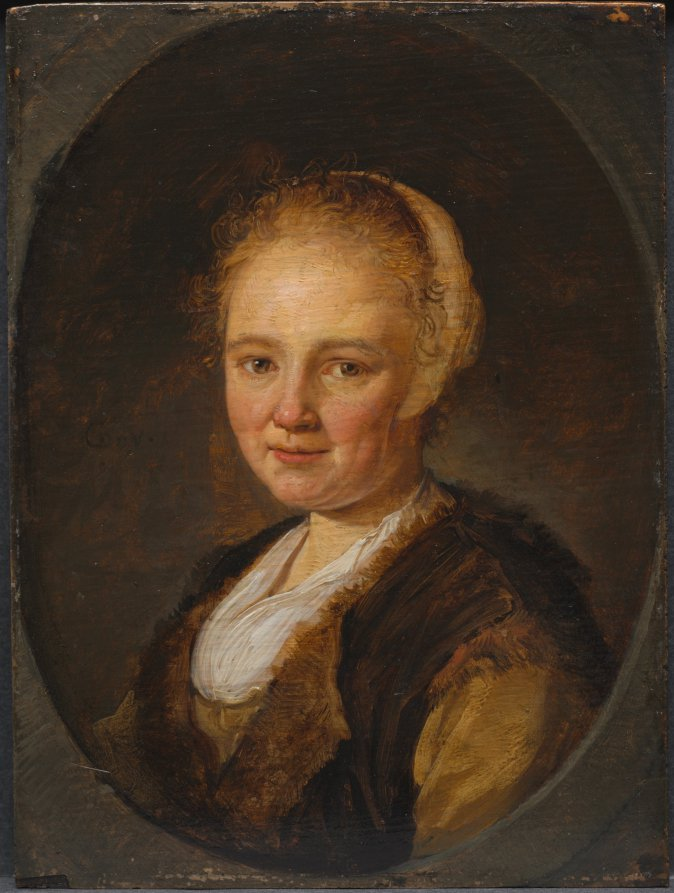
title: A Young Woman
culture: Netherlands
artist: Gerrit Dou (Dutch, 1613–1675)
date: 1640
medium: oil on wood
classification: Painting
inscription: Signed left center: "GDov."; "[GD in monogram]"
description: This painting may depict a specific person as in a traditional portrait. The less formal costume and the tight focus on the head, however, may mean that it is a tronie, a popular category of painting among Dutch painters in the 1600s. While painted from living models, tronies represent more general types of people, designed as beautiful images rather than accurate likenesses of people known to their patrons.